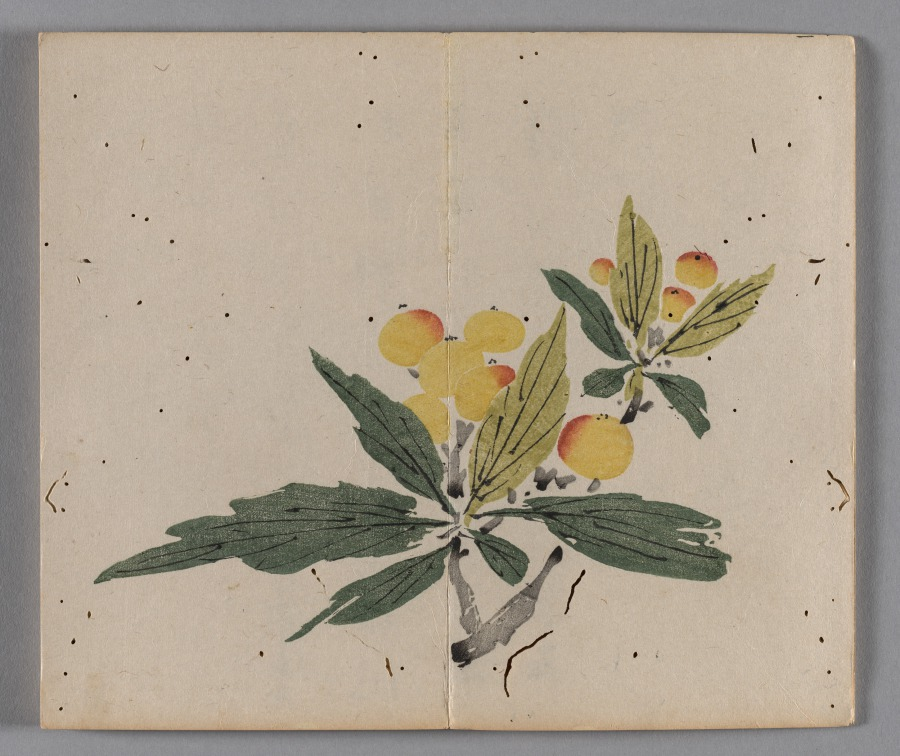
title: Ten Bamboo Studio Painting and Calligraphy Handbook (Shizhuzhai shuhua pu): Fruit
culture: China, Qing dynasty (1644-1911)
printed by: Hu Zhengyan (Chinese, c. 1584–1674)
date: 1633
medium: Woodblock-printed book; ink and colors on paper; first edition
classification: Print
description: Color printing reached a level of perfection in the early 1600s, as seen in this Ten Bamboo Studio Collection of Calligraphy and Painting and the Mustard Seed Garden Manual of Painting (printed 1679 and 1701). The painterly quality, precision in registering (aligning) the woodblocks, and harmonious colors made them the most successful color print editions in Chinese history. Both editions were printed and compiled in Nanjing, spread nationwide, and had a great impact on the arts in Japan and Korea.